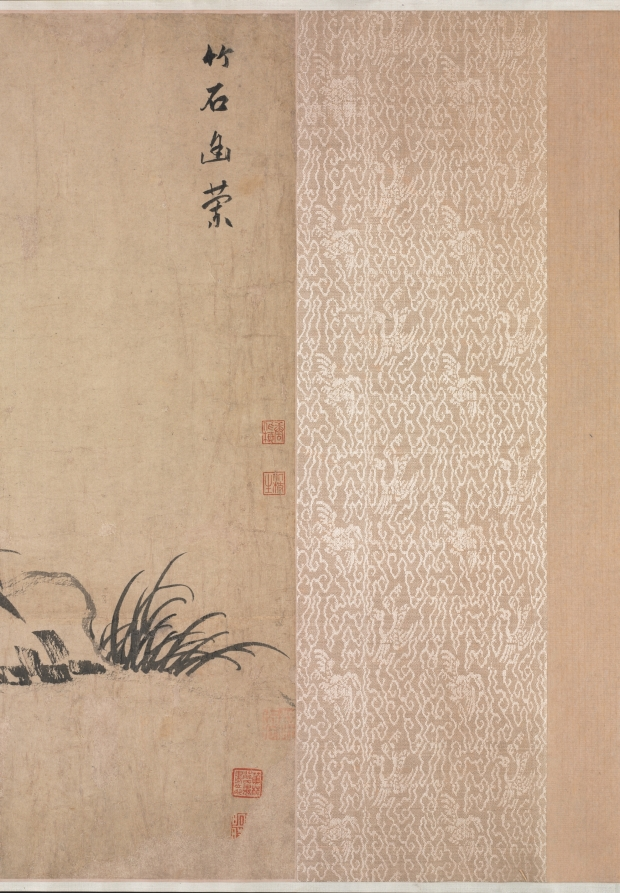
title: Bamboo, Rocks and Lonely Orchids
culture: China, Yuan dynasty (1271-1368)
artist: Zhao Mengfu (Chinese, 1254–1322)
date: 1271–1368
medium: Handscroll; ink on paper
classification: Painting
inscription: 竹石幽蘭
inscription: 孟頫為善夫寫. [印] 趙氏子昂; [印] 松雪齋; [印] 天水郡圖書印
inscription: 古人善書者必能畫點墨作蠅，便自有生意。松雪翁蘭石草聖飛帛筆法皆具，可寶也。安陽韓性 [印]明善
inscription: Colophon 2. Qiu Yuan 仇遠 (1247-after 1328), a respected poet during the Song and Yuan periods. He was linked to, among others, Zhao Mengfu and Gao Kegong. Zhao Mengfu painted a version of Nine Songs 九歌圖 for him, and Gao Kegong dedicated to him a painting titled Mountain Village 山村圖 (current whereabouts unknown). His poem here is also preserved in his collected works.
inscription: Colophon 3. Zheng Yuanyou 鄭元祐 (1292-1364), an erudite scholar and teacher of renown, active in Hangzhou and Suzhou. In the 1350s, when Gu Ying’s literary gatherings were at their peak, he was already elderly and participated in a limited way.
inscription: Colophon 4. Wu Kegong 吳克恭 (active mid-1300s), a friend of Gu Ying and Ni Zan 倪瓚 (1301–1374), a major Yuan painter.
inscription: Colophon 5. Angji 昻吉 (jinshi of 1348), of Western Xia 西夏 origin and a poet of distinction. He wrote an introduction to the painting Literary Gathering at Yushan 玉山雅集圖, of which Zhang Wo was the painter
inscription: Sheet 2. Yuan: friends of Gu Ying Colophon 6. Wang Zifang 王孜方 (active mid-1300s), an official who, at the time of his visits to Gu Ying’s estate, had reached the rank of Minister. He is better known under the name Wang Keju 王可矩.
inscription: Colophon 7. Ke Jiusi 柯九思 (1290–1343), a major official who served in the Kuizhang Pavilion 奎章閣 and as an advisor to Emperor Wenzong in matters of calligraphy and painting.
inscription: Colophon 8. Yu Li 于立 (active mid-1300s), a Daoist recluse, poet, and close friend of Gu Ying, so much so that during his visit to Gu Ying’s estate he was given accommodation in a special pavilion. His poem here is also preserved in Gu Ying’s Cao tang ya ji.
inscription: 至正十一年十月廿八日男奕百拜堇觀 [印] 趙奕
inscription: Colophon 10. Yu Ji 虞集 (1272-1398), a major official and literary figure who also served in the Kuizhang Ge. His poem is recorded in his collected works. The poem is one of a set of four inscribed at the request of Wang Huayu 汪華玉 on Orchids and Rock 蘭石圖 by Zhao Mengfu, obviously a different, long lost, painting. Wang Huayu was an official and a collector (jinshi of 1327). Yu Ji’s colophon here was written before 1348 and during his retirement in Linchuan 臨川, Jiangxi, possibly sent from there. It is possible he had not seen the painting, and his calligraphy here appears to be rather casual and detached, jotting down an old poem without much care, contrary to his earlier practice.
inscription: Colophon 11. Sun Shi 孫時 (mid-1300s–early 1400s), a native of Yuncheng 鄆城, Shandong, and a jinshi of 1390. He may have been quite young when paying a visit to the Yushan gatherings in the late 1340s and early 1350s.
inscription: Colophon 12. Zhang Zhu 張翥 (1287–1368), Qiu Yuan’s disciple and a poet of renown, who enjoyed a belated career in officialdom and was known for his integrity.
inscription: Sheet 4. Yuan and Ming: further friends of Gu Ying; colophon 17 begins the early Ming sequence. Colophon 13. Zhang Wo 張渥 (active c. 1336-after 1364), a frustrated scholar, a poet, and a painter of landscape and figures. An active participant in Gu Ying’s literary circle, he painted the Literary Gathering at Yushan, a pictorial document of the individuals and activities on Gu Ying’s estate. His rendering of Nine Songs is well known, and one version is in the collection of the Cleveland Museum of Art (see 1959.138). His poem here is also found in Gu Ying’s Cao tang ya ji, under the entry “ti Zhao Hanlin mo lan 題趙翰林墨蘭” (inscribed on the Ink Orchid by Zhao the Hanlin academician). This is a rare instance of calligraphy as well as signature by the artist.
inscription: 觀吳興公竹石幽蘭圖使人鄙吝頓消。其筆勢從橫天真爛澷，一出於二王書法。冝仲瑛寳而玩之異於常品也。至正八年十月天台陳基書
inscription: Colophon 15. Zhang Shen 張紳 (active about 1340–after 1385), a respected calligrapher and participant in Gu Ying’s literary gathering. He resided in Kunshan, the same city where Gu Ying’s estate lies. In the third line of the poem, he mentioned Gu Ying’s hao, “Jinsu 金粟.” This was a name he assumed later in life, after the death of his mother in the year 1356. Thus this inscription must have been written after that date.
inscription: Colophon 16. Wang Sun 汪遜 (active mid-14th century), a little-known native of Kuaiji 會稽, who may have been one of the infrequent visitors to Gu Ying’s estate.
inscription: Colophon 17. Hu Guang 胡廣 (1370-1418) is the first Ming colophon writer on this scroll. He was an official of great power in the court and a trusted advisor of Emperor Chengzu; he served as the Grand Academician of the Hall of Literary Profundity 文淵閣大學士 and Grand Academician of the Left Secretariat of the Heir-Apparent 左春坊大學士.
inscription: Sheet 5. Early Ming Colophon 18. Wang Yinshi 王尹實 (active about 1403–about 1424), a native of Siming 四明, Zhejiang, and a minor official and calligrapher.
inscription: Colophon 19. Zhang Yuchu (signed here as “Wuwei 無 為”), the forty-third Heavenly Master of the Zhengyi sect of Daoism. A man of erudition, he was also a poet, painter, and calligrapher. A modified version of the poem here was published in his collected works titled Xian quan ji 峴泉集. A slight modification in the first line is the only change: “Wu xing miao yao nian bing xue zi 吳興玅年氷雪姿.”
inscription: Colophon 20. Yao Guangxiao 姚廣孝 (1335-1418), a Buddhist monk, scholar, and counselor to Chengzu in his successful attempt at usurpation of the throne. Yao Guangxiao was a controversial figure but wielded enormous power.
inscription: Sheet 6. Wang Ning alone Colophon 21. Wang Ning 王寧 (d. 1411) signed as “Qingzhen 清真” in this colophon. One of the three seals reveals his identity as the Yongchun Hou 永春侯 [Marquis of Lasting Spring] (appointed 1402), and the husband of Princess Huaiqing 懷慶公主 (1328-1398), the sixth daughter of the founder of the Ming dynasty, Zhu Yuanzhang. This colophon postdates 1402.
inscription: Sheet 7. Mid-Ming Colophon 22. Ou Yi’an 區易安 (active first half of 15th century), unknown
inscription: Colophon 23. Chen Lian 陳璉 (1370-1454), a native of Dongguan 東莞, Guangdong 廣東, and an official admired for his erudition and perspicacity. In view to the known calligraphic style of Chen Lian, this colophon appears to be a transcription and not written by him.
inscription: Colophon 24. Wei Ji 魏驥 (1374-1471) enjoyed longevity (he lived to the age of ninety-eight) and an extended length of service as an official. A jinshi of 1406, he eventually became the Minister of Personnel in Nanjing 南京吏部尚書. The colophon here is dated 1434, when he was invited to view the painting by the Court Musician Mo Zhizhong 莫至翀, its owner. Again, in view of its calligraphic style, this was not written by him, but is a transcription from the original.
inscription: Colophon 25: Zhang Yi 章鎰 (active 1462-1473), a Ningbo native and an official with a reputation for courage and integrity.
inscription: Sheet 8. Further mid-Ming Colophon 26. Yin Zhi 尹直 (1427-1511), a controversial figure in Ming politics in spite of his erudition and high position as the Minister of War 兵部尚書.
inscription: Colophon 27. Zou Yu 鄒虞 (active 1460-1520; jinshi of 1490), a native of Hangzhou. In 1510, he was appointed Administrative Vice Commissioner in Guangdong.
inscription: Sheet 9. Xu Shouhe 徐守和 alone Colophon 28. Xu Shouhe 徐守和 dated his entry in 1629. Since he wrote it in his own studio, The Lesser Qingbi Pavilion 小清閟, he was likely the owner of the scroll. Xu’s life is not well documented; he was a connoisseur of note during the last years of the Ming dynasty rule. He may have acquired the Cleveland scroll from Wu Ting, whose seals appear here.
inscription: Sheet 10. The mounter’s note. Xu Shudong 徐曙東 of Jiaxing 嘉興 made the remounting on the first day of sixth month, 1802.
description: Bamboo and orchids are motifs associated with the virtues of the scholar-official. Bamboo that bends but does not break stands for moral integrity, endurance, and loyalty. Wild, fragrant orchids that bloom in the shadow symbolize modesty and the aura of learnedness. Rocks are often considered to be miniature versions of mountains that form the universe. This monochrome ink painting is brushed on paper in a masterfully calligraphic manner. While the rocks are delineated in chalky, dry strokes showing the effect of flying white (feibai), the bamboo and orchids are drawn with a swift brush demonstrating the virtuosity of the artist.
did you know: One of the many inscriptions records that the handscroll was last remounted by Xu Shudong 徐曙東 of Jiaxing 嘉興 in 1802.